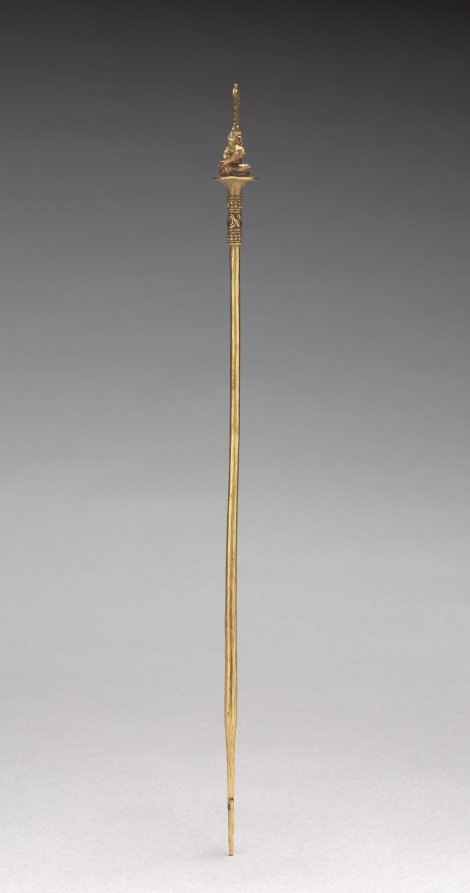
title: Lime Dipper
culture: Colombia, Calima region, Yotoco style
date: c. 1–800 CE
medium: gold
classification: Metalwork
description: Coca-leaf chewing was a widespread ritual in ancient South America. Utensils included a container and a dipper or spoon for powdered lime (made from seashells), added to the coca to enhance its gentle, stimulating effect. Colombian cultures are especially known for transforming these utensils into works of art made of precious metal. The image on the tallest dipper is wonderfully complex. A serpent coils at the bottom, beneath a snarling animal with a huge, vertical tail. This animal has a tiny monkey on its back; the monkey also has a huge tail, which rests on the first animal's head like a headdress. This intricate image was created with the lost-wax casting process.